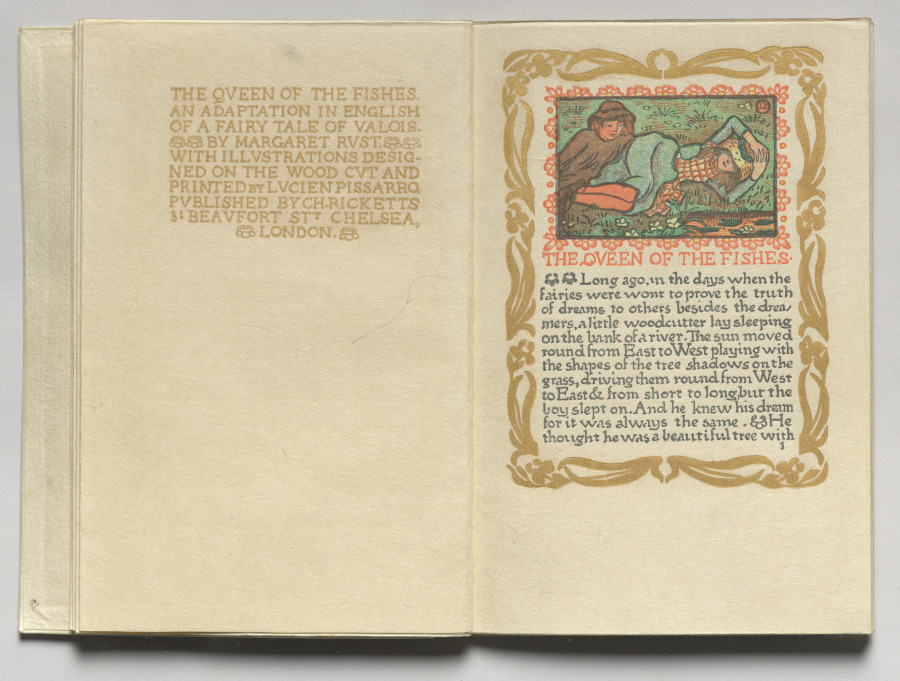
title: The Queen of the Fishes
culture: England, 19th century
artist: Lucien Pissarro (British, 1863–1944)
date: 1894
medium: Bound volume with color wood-engraved illustrations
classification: Bound Volume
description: “The Queen of the Fishes” is a French fairy tale about two mistreated children who turn into a fish and an oak tree. This edition was the first book published by the Eragny Press, the private firm of Lucien Pissarro, son of impressionist painter Camille Pissarro. Following the example of William Morris, Lucien wanted to return to the careful design and high-quality materials of early printed books. He and his wife, Esther Bensusan Pissarro, made this publication almost entirely by hand, including designing and engraving all the illustrations and ornaments.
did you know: Lucian Pissarro was a son of Impressionist painter Camille Pissarro.